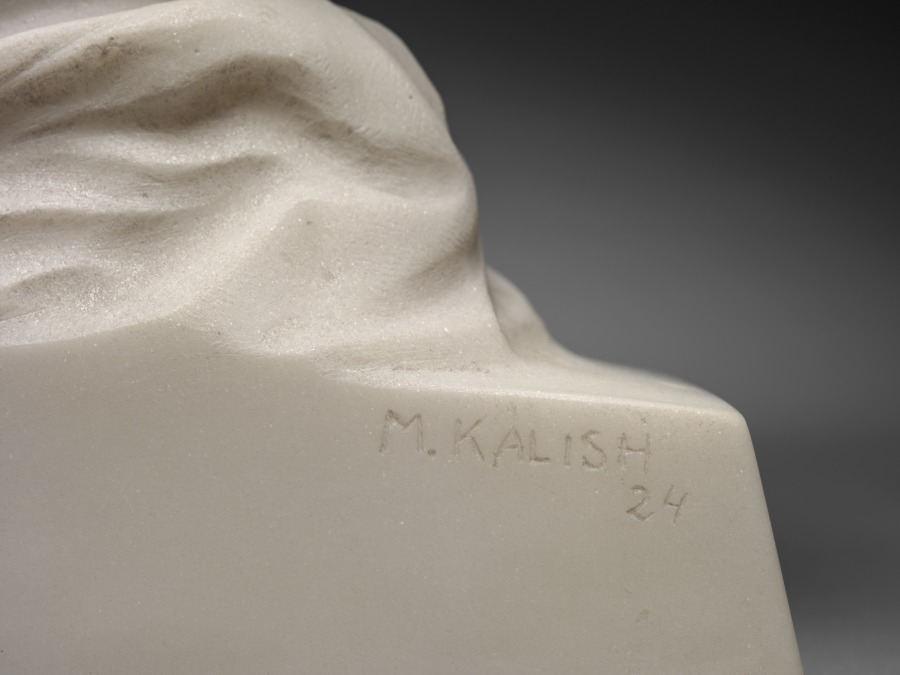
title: Torso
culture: America, Ohio, Cleveland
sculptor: Max Kalish (American, born Russian Empire [now Lithuania], 1891–1945)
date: 1924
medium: marble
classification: Sculpture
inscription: Signed on right side near side of base.: "M. Kalish 24"